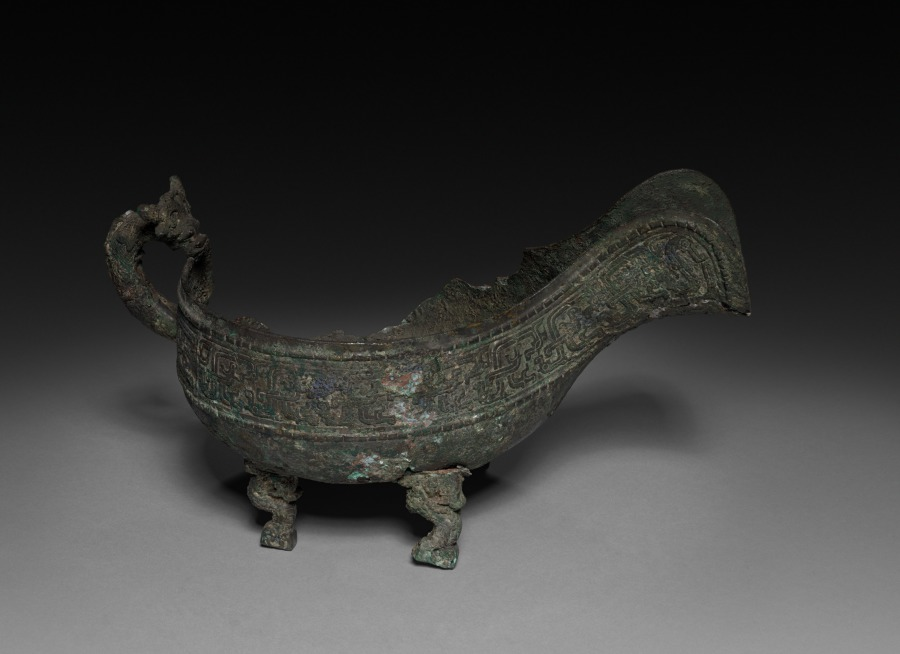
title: Sacrificial Vessel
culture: China, Ming dynasty (1368-1644) ?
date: Ming dynasty (1368–1644) ?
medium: bronze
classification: Metalwork